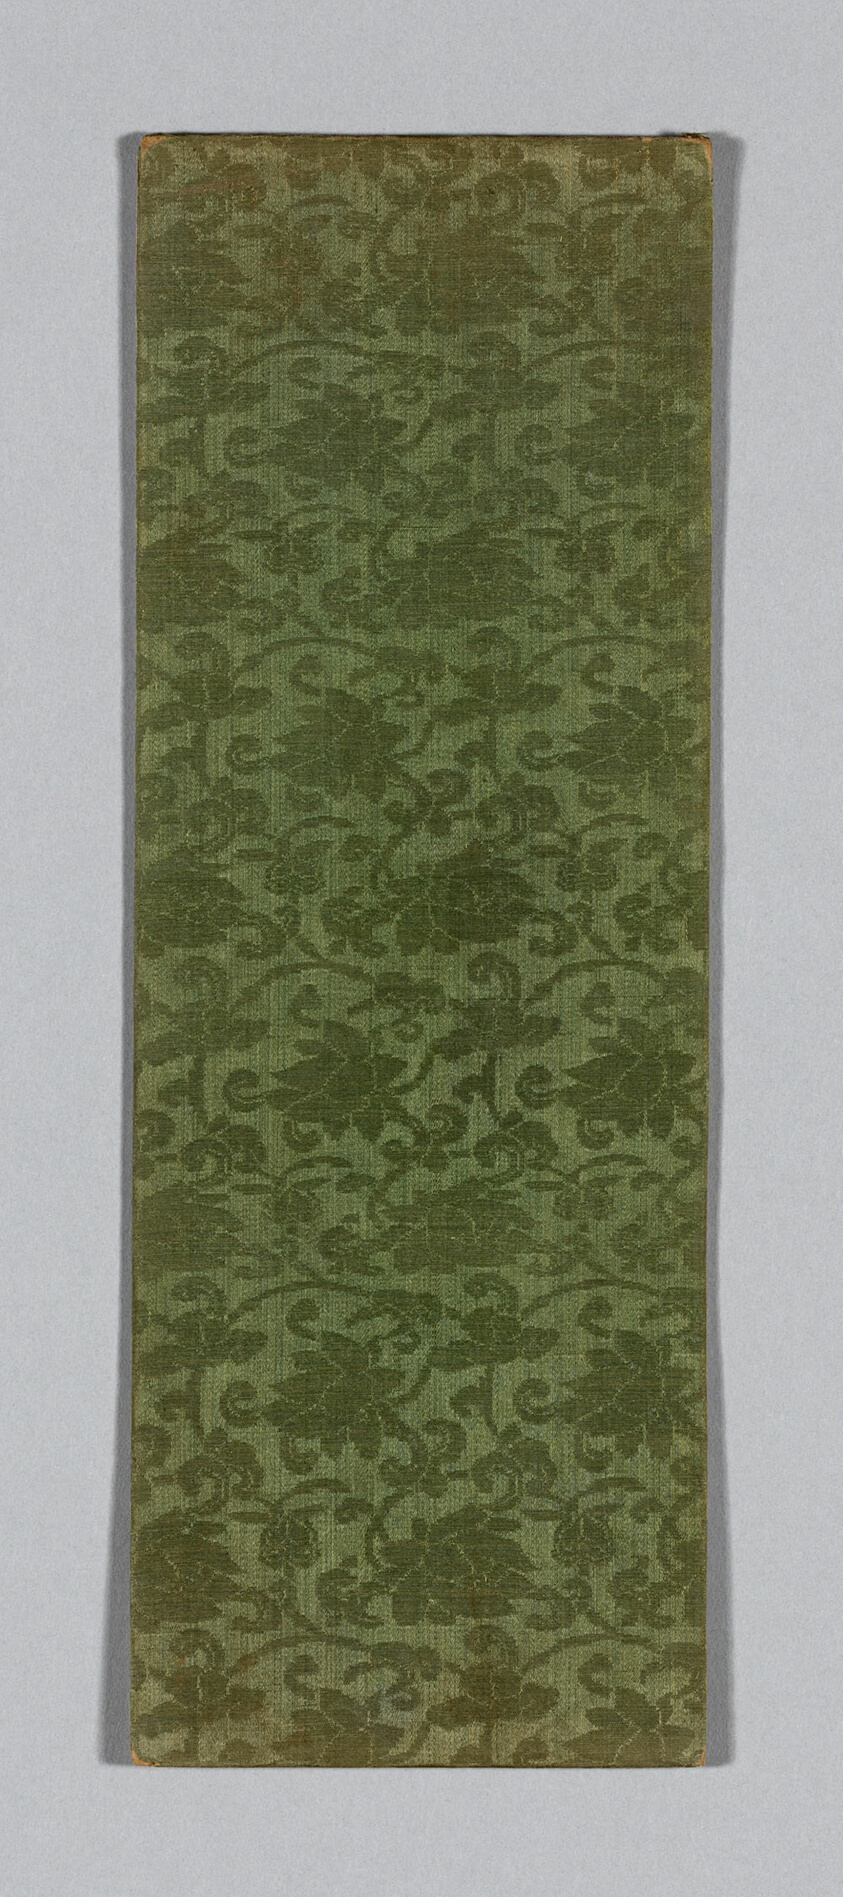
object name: Textile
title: Sutra Cover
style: ming, Chinese (culture or style), East Asian, asian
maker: China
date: Ming dynasty (1368–1644), c. 1590's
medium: Silk, 4:1 satin damask weave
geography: China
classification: textile; weaving